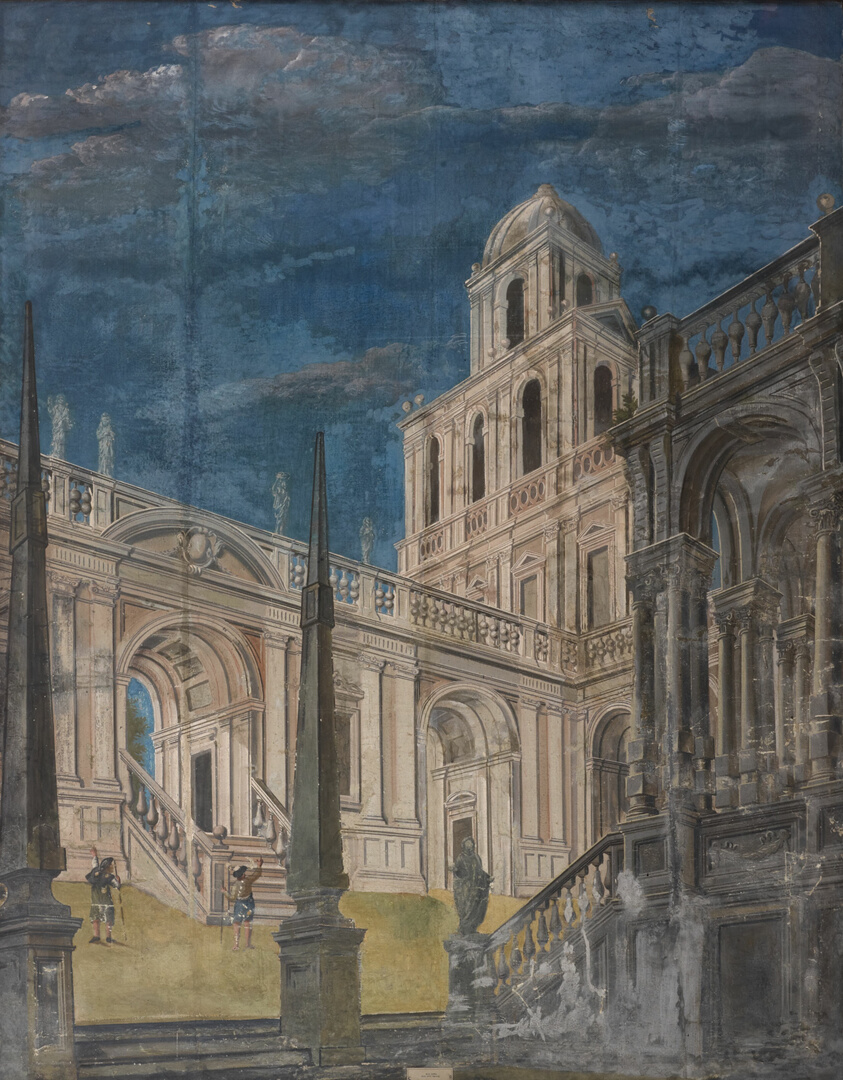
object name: Coverings and Hangings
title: Panel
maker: Probably France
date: 1820/40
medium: Block-printed paper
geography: France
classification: wallpaper; paper; european decorative arts